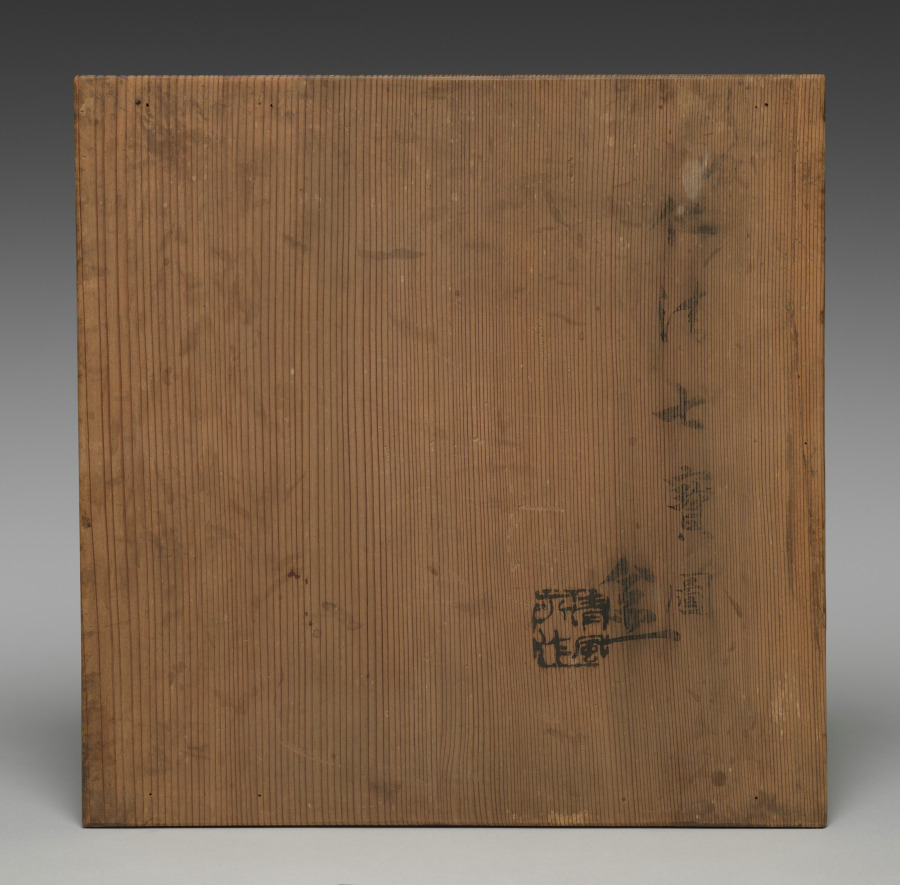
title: Covered Bowl with Seven Treasures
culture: Japan, Edo period (1615–1868)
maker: Seifū Yohei II (Japanese, 1844–1878)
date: 1861–78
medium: Stoneware with overglaze color enamel and gold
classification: Ceramic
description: The box lid for this large covered bowl by Yohei II identifies it as in the style of Ninsei, a reference to Nonomura Ninsei. Overglaze enamels in red, green, and white sit within lattices of jewel-shaped gold forms scattered across the lid and base in a design known as the seven treasures. At the center of the lid is a knob in the shape of a peach with a stem and leaves. A prominent feature of the piece is the appearance of warm pink dots known as gohon. Here creamy at their center and with a gradation to almost red at the edges, they appear during firing due to high iron content in the clay. Pieces with this effect were made in emulation of certain ash-glazed ceramics imported from Korea. The originals were made to order for the Japanese market at a kiln in Busan. The kiln was established within the Japanese diplomatic compound in that port city by the lord of Tsushima in 1639 and continued production until 1717. In the 17th century, teabowls from Korea in a variety of styles were extremely popular among practitioners of Japanese-style tea, and they were soon copied by ceramists active on the archipelago, including in Kyoto.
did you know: The peach's leaf veins are detailed in gold.